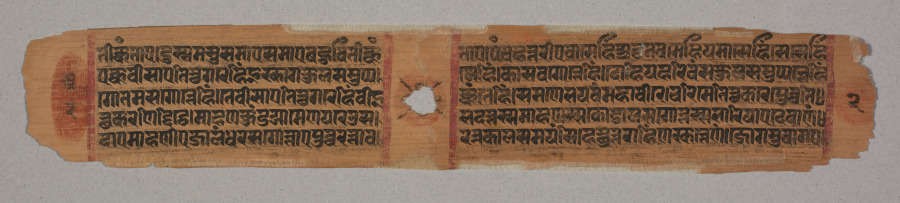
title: Folio 2 (verso), from a Kalpa-sutra and Story of Kalakacharya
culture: Western India, Gujarat, 13th century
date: 1287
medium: gum tempera and ink on palm leaf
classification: Painting